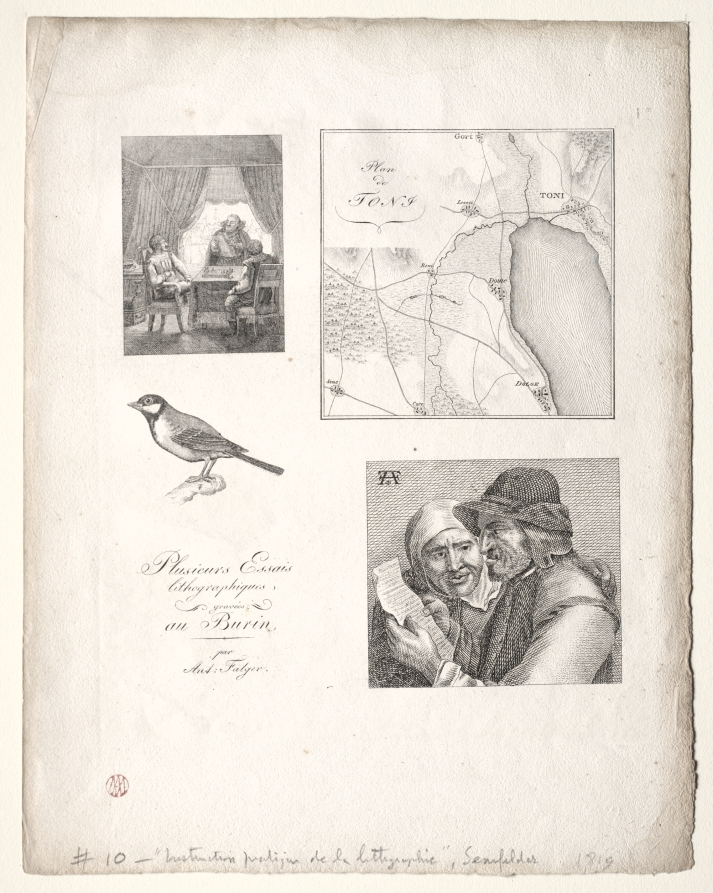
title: L'art de la litographie:Four Subjects after Falger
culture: Germany, 19th century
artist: Alois Senefelder (German, 1771–1834)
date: 1819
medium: lithograph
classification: Print